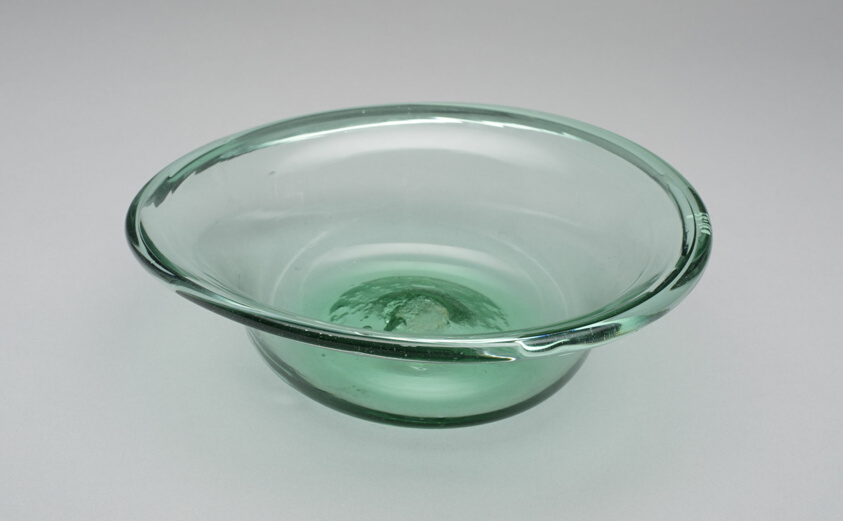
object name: Glass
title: Bowl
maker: Artist unknown (American, 19th century); Probably Pittsburgh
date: c. 1835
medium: Blown glass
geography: Mount Clemens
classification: bowl; glass; american decorative arts; american arts; decorative arts